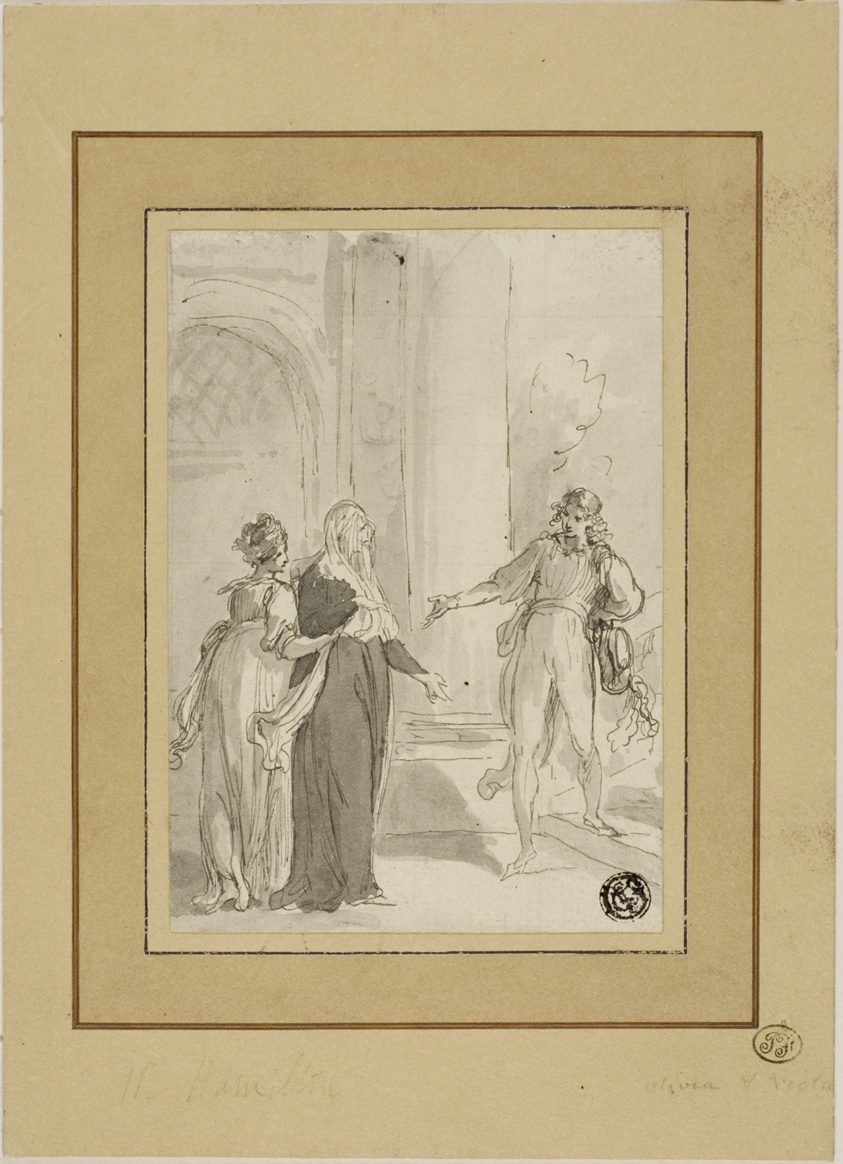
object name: Drawing and Watercolor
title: Study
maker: William Hamilton (English, 1751-1801)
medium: Pen and gray ink, with brush and gray wash, on ivory laid paper, laid down on card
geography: England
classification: ink or chalk wash; drawings (visual works); prints and drawing